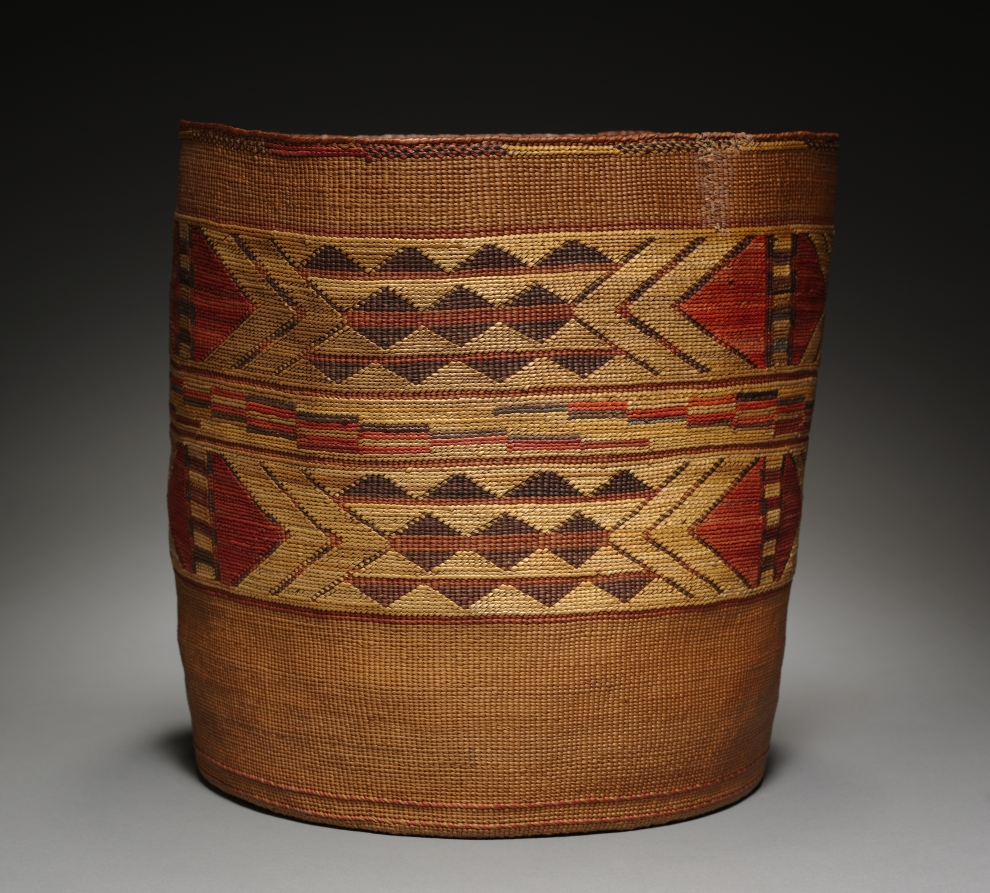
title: Cooking Basket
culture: Northwest Coast, Tlingit, late 19th Century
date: late 1800s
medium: Spruce root; twined, false embroidery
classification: Basketry